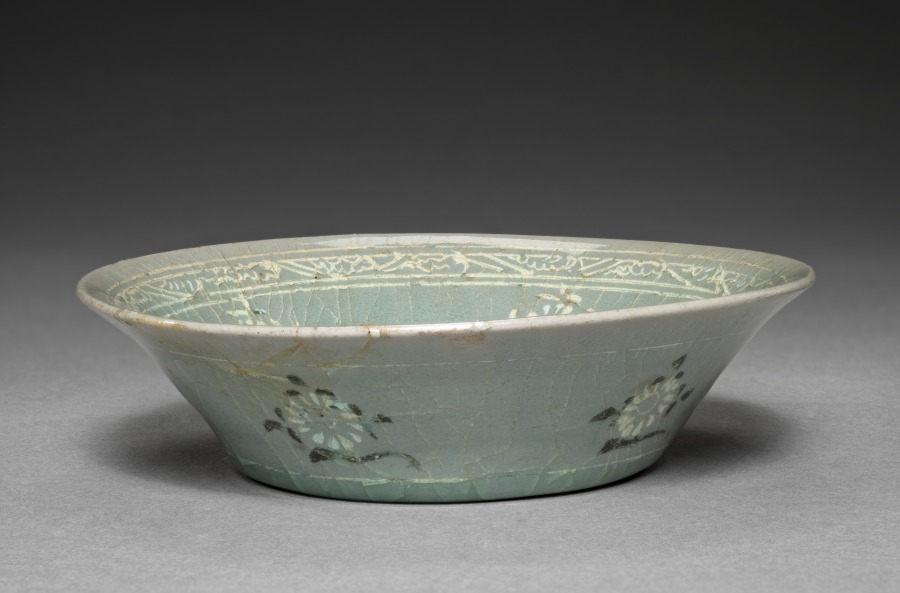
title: Dish with Inlaid Chrysanthemum Design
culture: Korea, Goryeo dynasty (918–1392)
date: 1200s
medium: ceramic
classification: Ceramic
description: Celadon wares used for everyday such as this dish were among the most common burial objects in tombs during the Goryeo period (918–1392). Furnishing tombs with an elaborate assemblage of objects was believed to honor and comfort the newly dead. Generally, Goryeo tombs were left untouched until the late 1800s. During the colonial period (1910–45), however, Japanese archaeologists competitively excavated the tombs located in Kaeseong, the former capital of the Goryeo period, and these wares soon became available for Japanese and Western collectors.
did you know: On the base of this tea bowl, three small spur marks made of bits of clay remain visible, indicating an individual protective casing of fire clay (saggar).